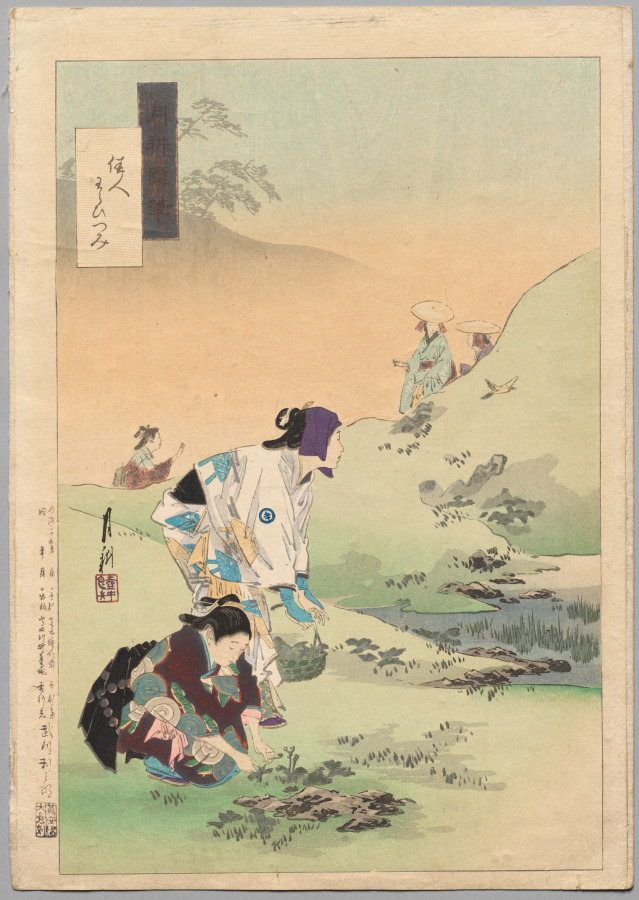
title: Beauties Harvesting Bracken, from the series Gekkō’s Miscellaney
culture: Japan, Meiji period (1868–1912)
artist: Ōgata Gekkō (Japanese, 1859–1920)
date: c. 1886–1899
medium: Woodblock print, ink and color on paper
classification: Print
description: The print series Gekkō’s Miscellaney wanders through a variety of genres. This print captures an agricultural scene of women gathering bracken. Ōgata Gekkō distinguished himself as a younger artist in the first exhibition of the Painting Appreciation Society (Kangakai) in 1885. He went on to earn prizes at world’s fairs and expositions in both the US and Europe.